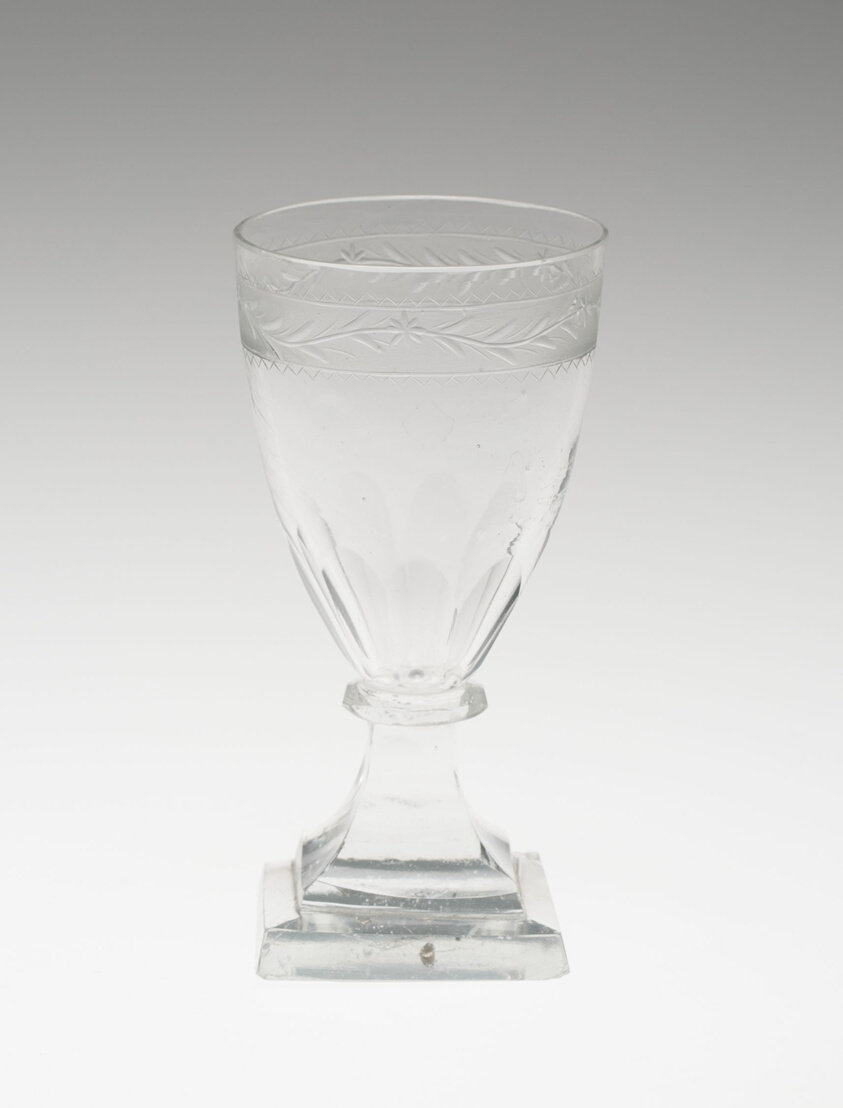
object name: Glass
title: Dwarf Ale Glass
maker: England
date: 1750/1850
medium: Glass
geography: England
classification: drinking vessel; glass